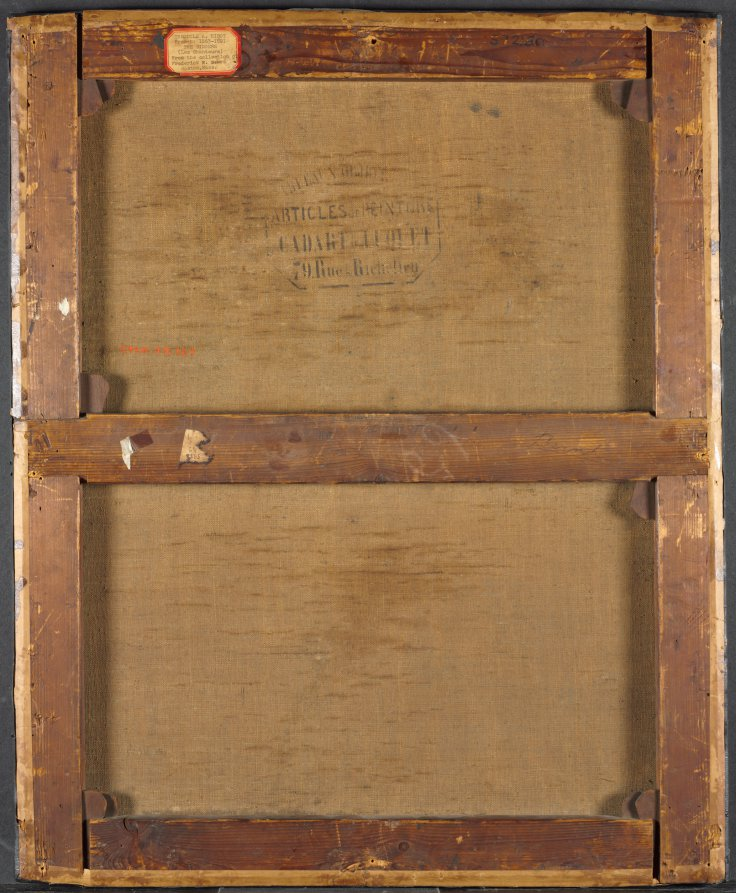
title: Singers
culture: France, 19th century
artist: Théodule Ribot (French, 1823–1891)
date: 1863–1868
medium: oil on fabric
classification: Painting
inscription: Signed lower left: t. Ribot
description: Ribot participated in a loosely defined artistic movement known as Realism, which sought to depict the gritty lives of workers and peasants. Often dark in tone and somber in mood, Realist paintings focused attention on social problems. Poor singers like these could be seen on the streets of Paris, but pictures of such singers were already a long-established theme in art history.